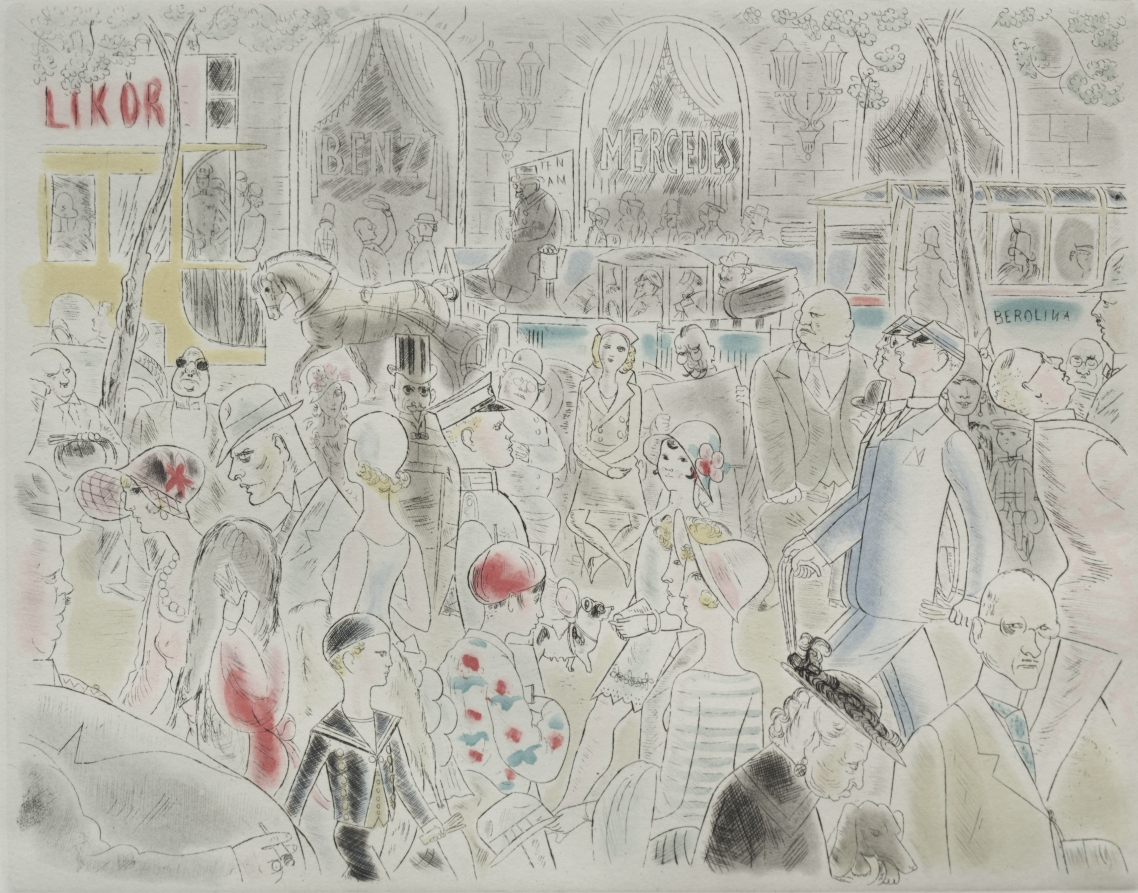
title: Streets and Fares of Berlin: Under the Linden Trees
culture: France, 20th century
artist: Charles Laborde (French, 1886–1941)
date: 1930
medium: color etching and aquatint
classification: Print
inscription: signed in graphite in lower left corner of sheet: Chas Laborde; inscribed in graphite in lower right edge of sheet: Unter den Linden; numbered 72/141